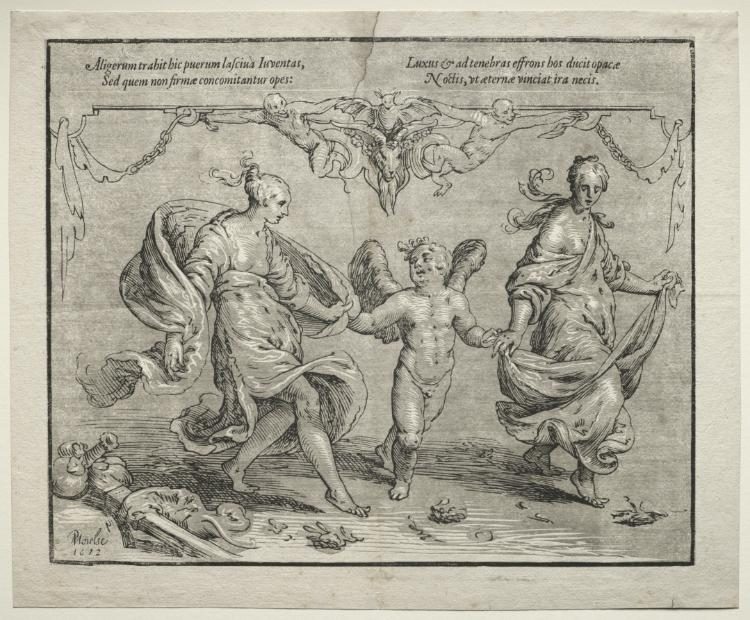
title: Cupid dancing with two allegorical women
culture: Netherlands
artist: Paulus Moreelse (Dutch, 1571–1638)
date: 1612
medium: chiaroscuro woodcut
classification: Print